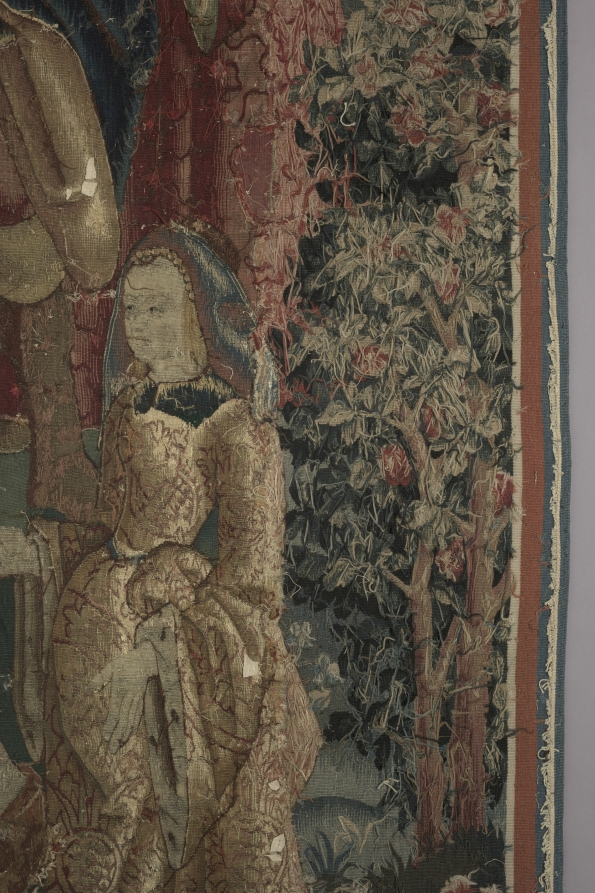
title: Shepherds in a Round Dance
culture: Netherlands, early 16th century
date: around 1500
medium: Wool and silk: tapestry weave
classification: Tapestry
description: Late medieval tapestries often use a limited yet contrasting color palette to portray stylized images. The expressions of these figures, for example, are conveyed more by their postures than by their faces. Four shepherds and shepherdesses join hands and dance to the music of a bagpiper at the far right, while a lord and two ladies on the left look on. A dog and sheep amid blossoming plants and trees contribute to the festive pastoral scene in front of a castle.